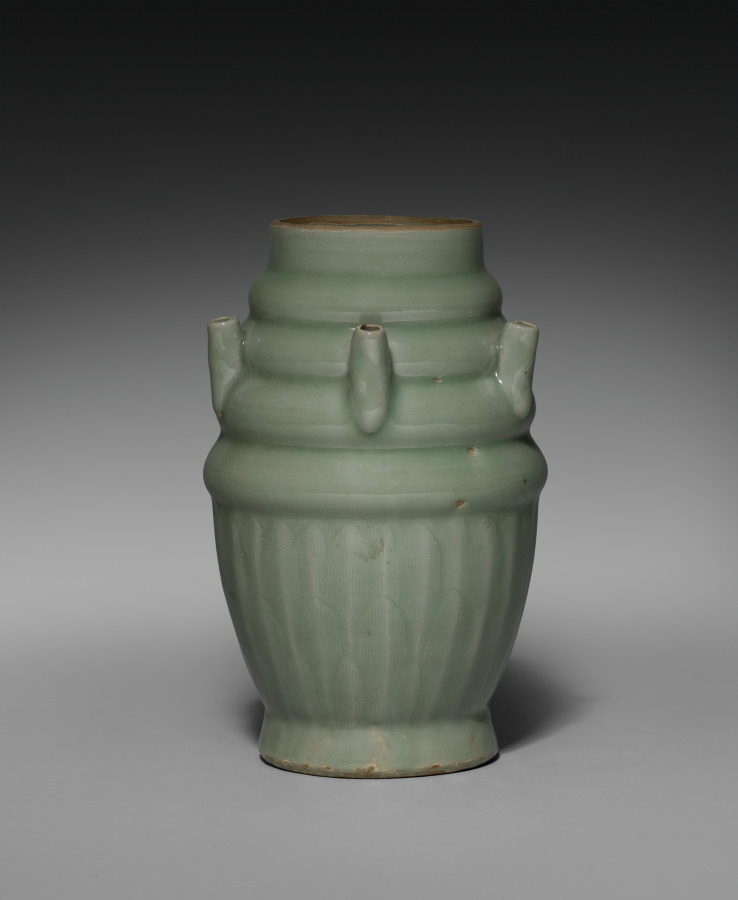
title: Five-Spouted Vase with Cover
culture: China, Zhejiang province, Longquan region, Northern Song dynasty (960-1127)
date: 1000s-1100s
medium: green-glazed porcelaneous stoneware, Longquan ware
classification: Ceramic